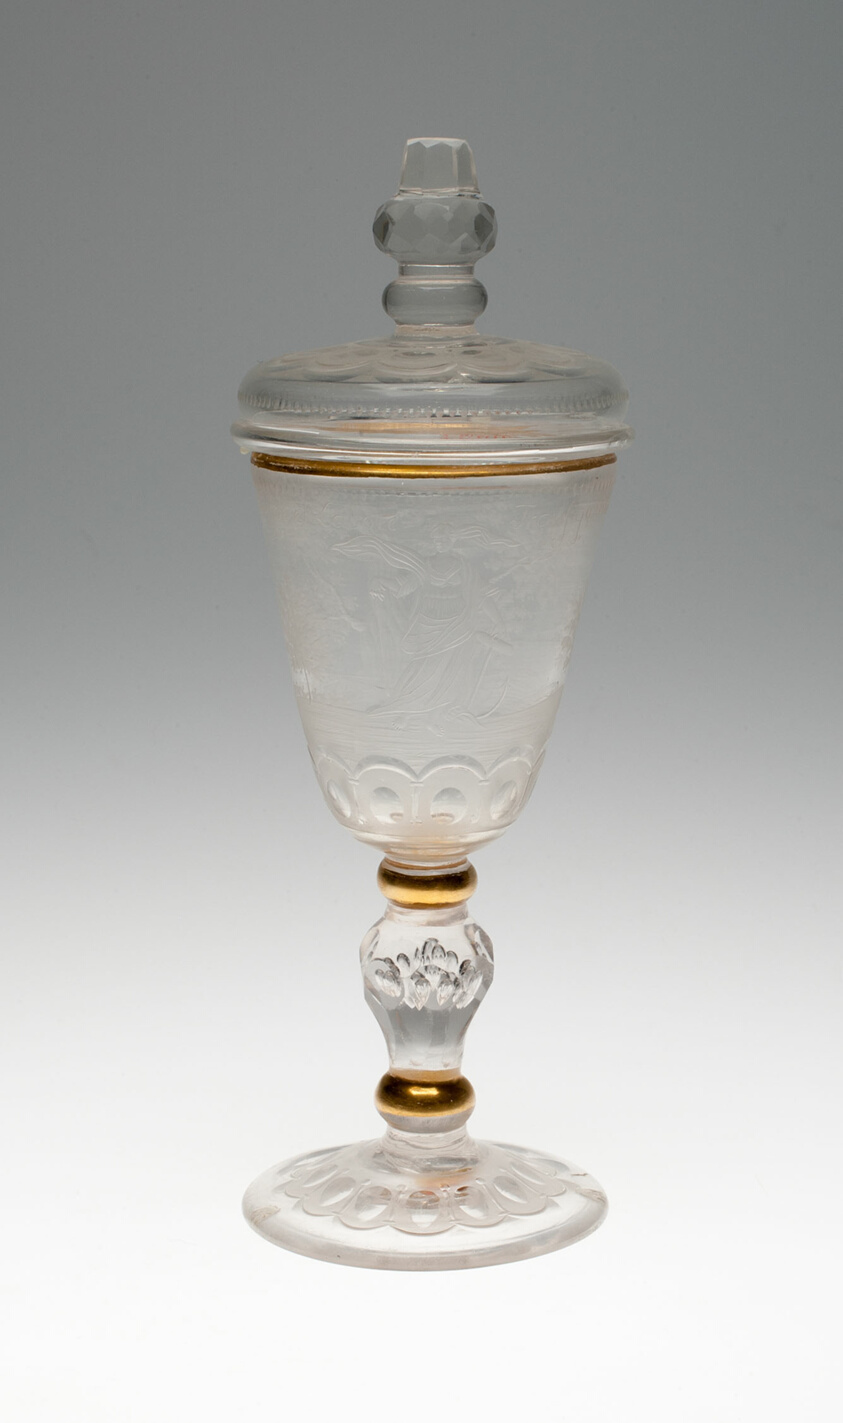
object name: Glass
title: WIne Glass and Cover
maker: Germany, Potsdam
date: c. 1740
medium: Glass; engraved and gilt decoration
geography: Potsdam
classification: drinking vessel; glass; european decorative arts